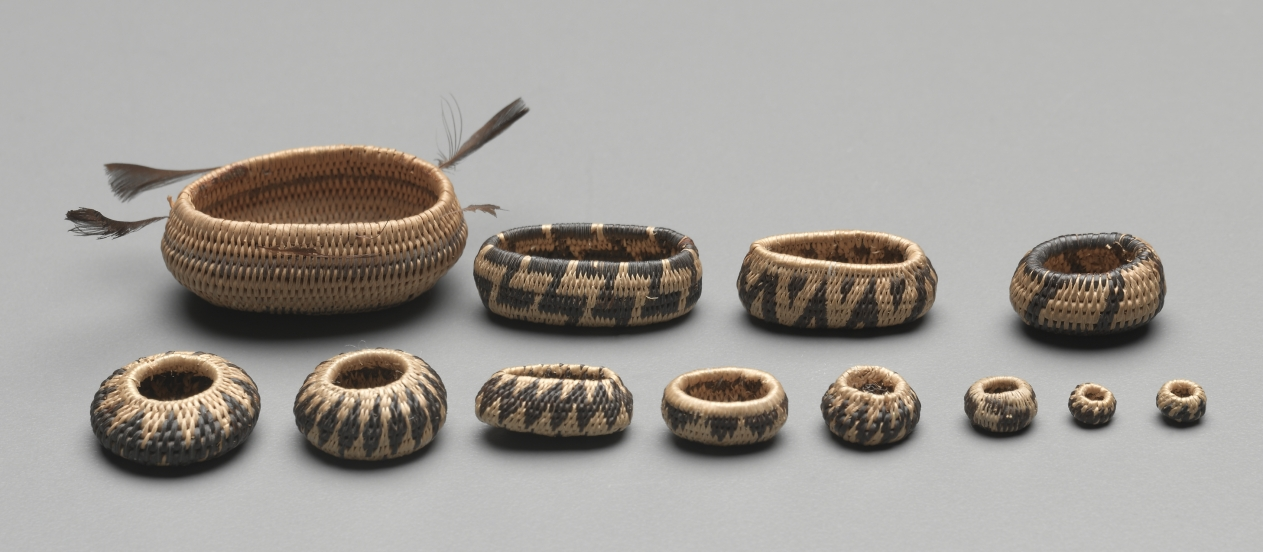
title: Miniature Round Basket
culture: California, Pomo, late 19th-early 20th century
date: late 1800s-early 1900s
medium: plant materials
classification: Basketry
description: Miniature baskets were made to demonstrate the basket-maker’s virtuoso skill, and these tiny marvels seem to be no exception -- the smallest are just a few millimeters wide but still patterned. For such fine work, dexterity was required as much for preparation of materials as for weaving.